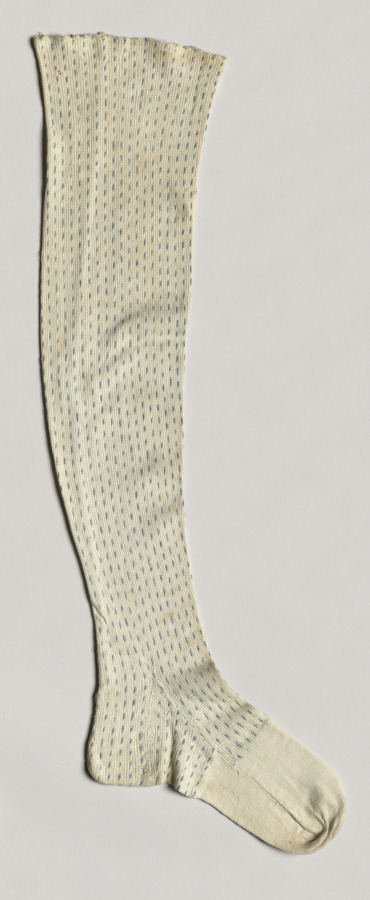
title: Stocking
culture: America, New York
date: 1790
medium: knitting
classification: Knitting